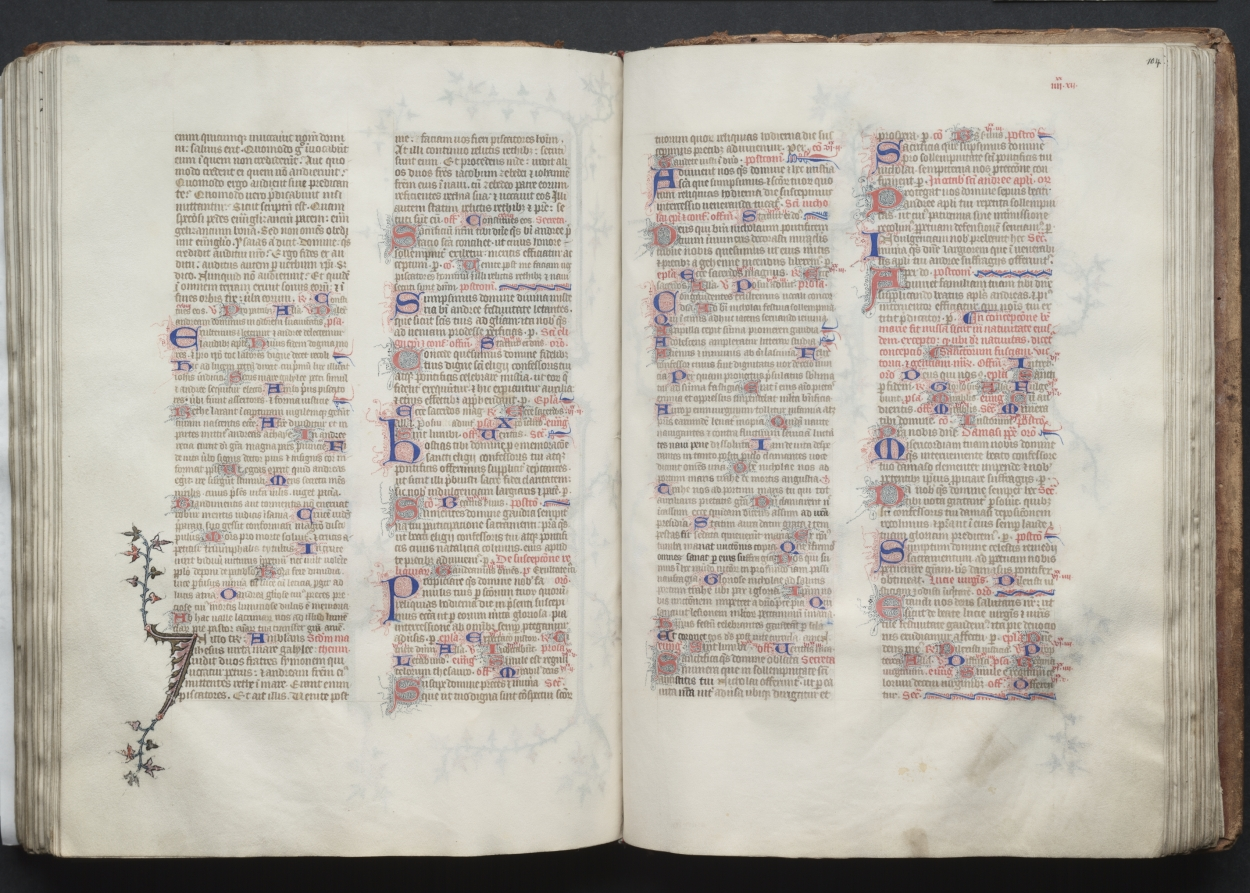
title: The Gotha Missal: Fol. 103v, Text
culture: France, Paris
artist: Master of the Boqueteaux (French)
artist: and Workshop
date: c. 1375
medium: ink, tempera, and gold on vellum; blind-tooled leather binding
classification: Bound Volume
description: The style and quality of this manuscript's decoration is typical of deluxe Parisian books made for aristocratic or royal patrons. Most of the book's decoration appears to be the work of the Master of the Boqueteaux, an artist active at the court of King Charles V (died 1380). His style was apparently shared by a number of book illuminators working in and around Paris. It is very possible that the Gotha Missal belonged to Charles V, but is not provable because the manuscript has no royal portraits and lacks a colophon. Given the book's magnificent decoration, however, it would seem that it was produced for a Valois prince, if not for the king himself. The manuscript receives its name from the German dukes of Gotha, its later owners.